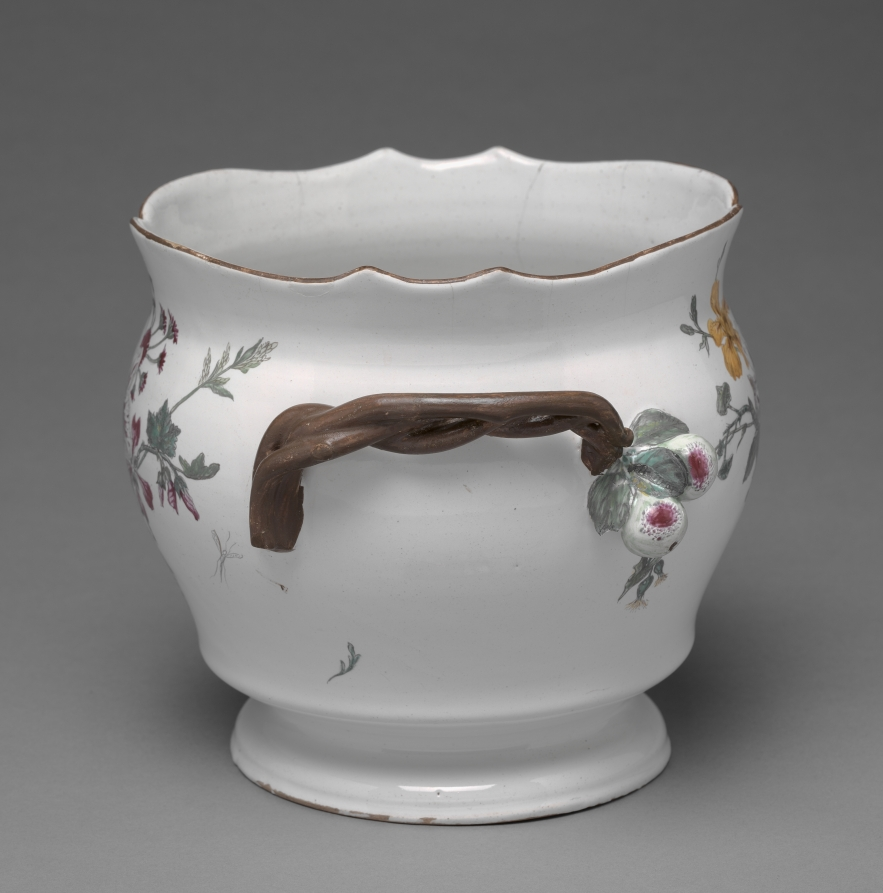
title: Wine Cooler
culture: France, Marseilles, 18th century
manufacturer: Joesph- Gaspard Robert Factory (French)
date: c. 1760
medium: tin-glazed earthenware (faience) with enamel decoration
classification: Ceramic